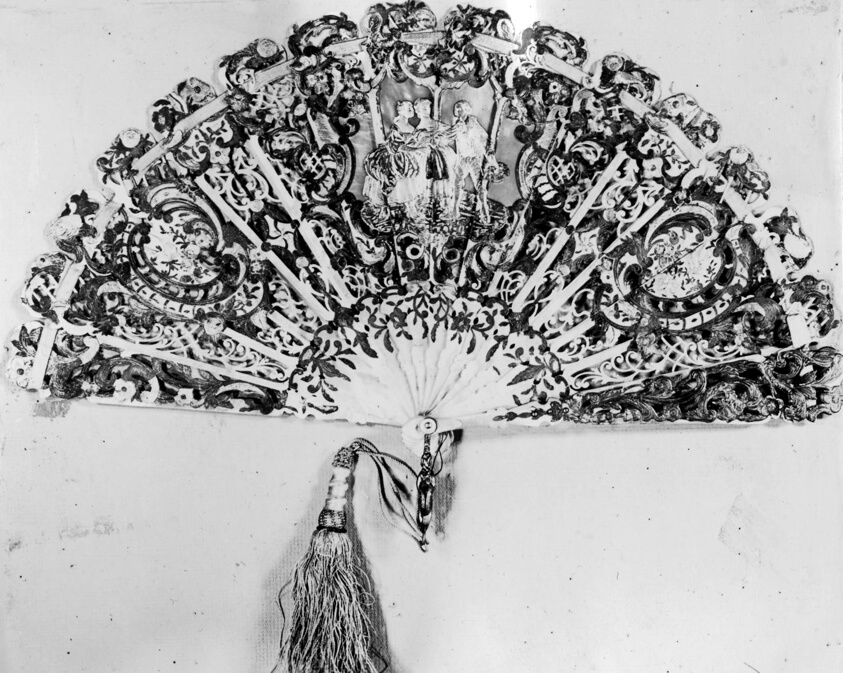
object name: Costume and Accessories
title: Fan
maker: France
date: 19th century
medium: Pearl with pierced and gilded decoration; pearl rivet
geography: France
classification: textile; fan - misc; costume accessory - folding fan; costume accessory; costume